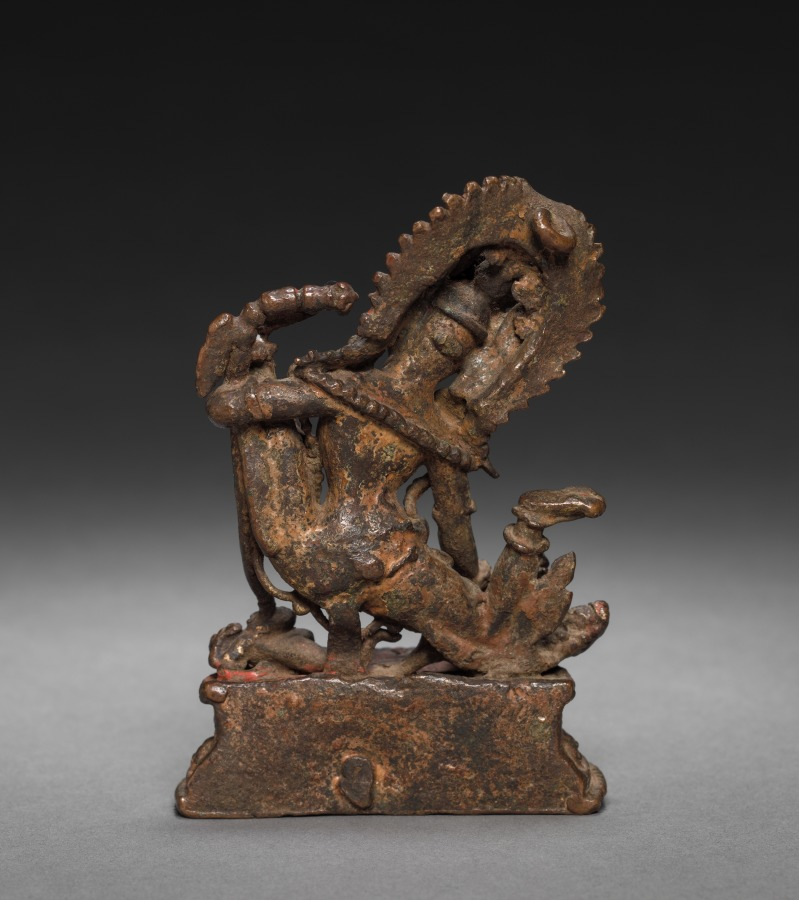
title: Achala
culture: Nepal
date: 1500s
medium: brass or bronze; turquoise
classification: Sculpture